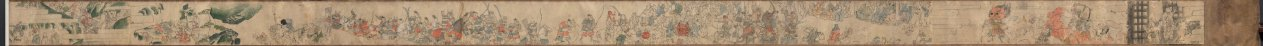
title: Oeyama Engi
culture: Japan, Edo period (1615–1868)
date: 1615–1868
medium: one of a pair of handscrolls; ink and color on paper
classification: Painting